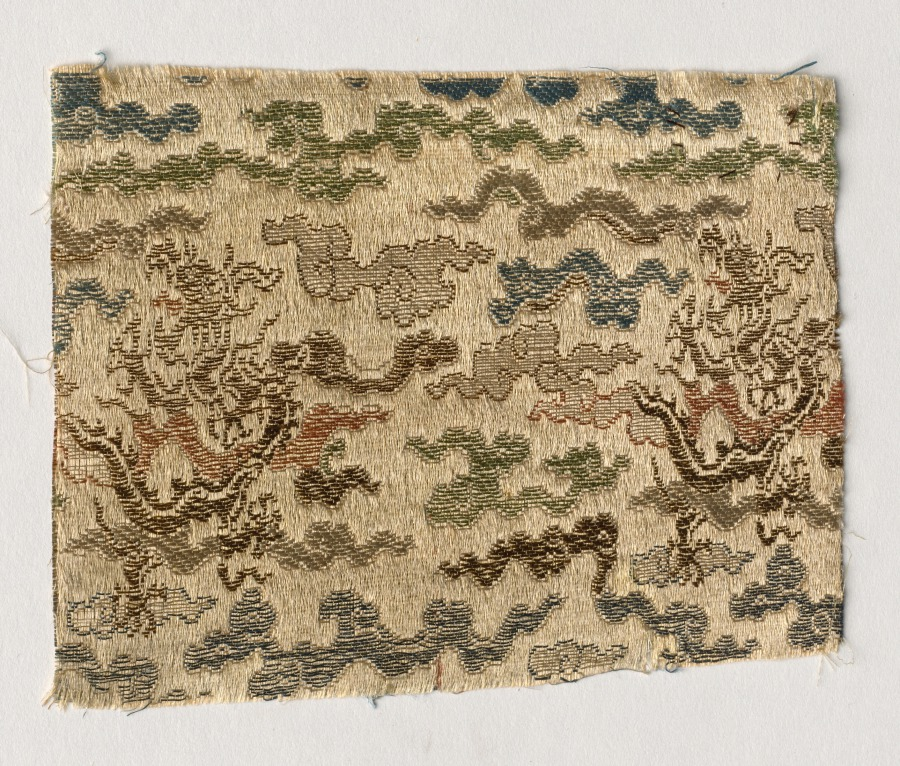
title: Fragment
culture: China, 18th century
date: 1700s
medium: satin ground; silk diasper weave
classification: Textile